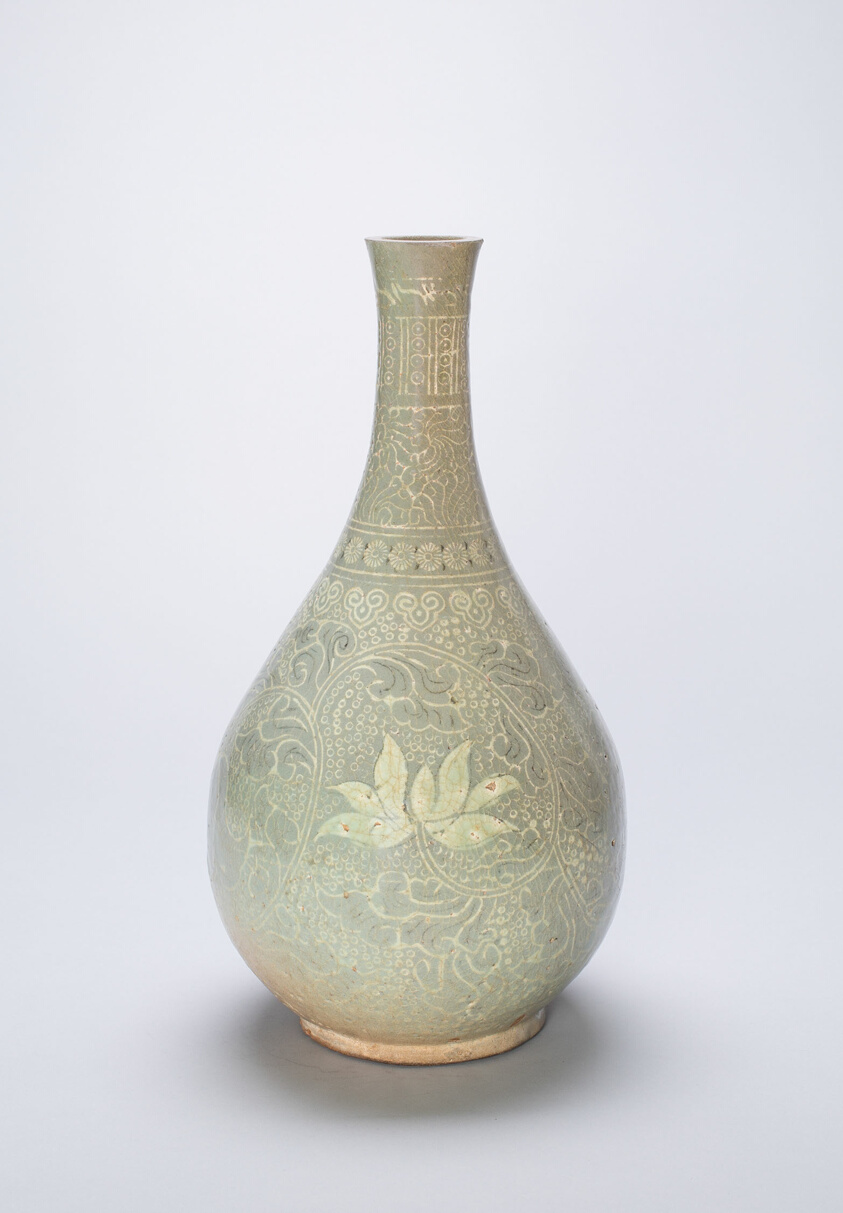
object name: Vessel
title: Bottle-Shaped Vase with Lotus Flowers and Stylized Scrolls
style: Korean (culture or style)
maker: Korea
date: Goryeo dynasty (918–1392), 14th century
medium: Celadon-glazed stoneware with underglaze inlaid decoration of black and white clays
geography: Korea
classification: vase; vessel; asian art; ceramics